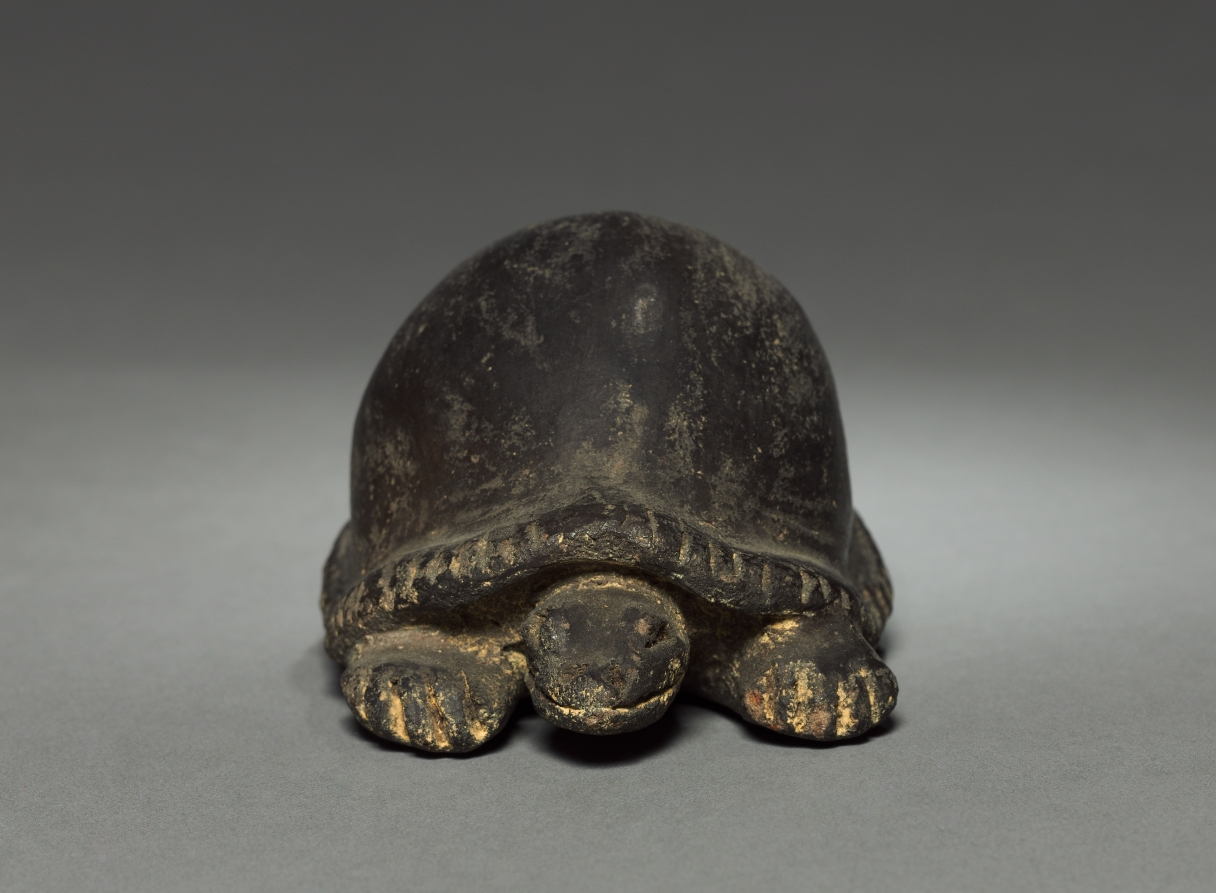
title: Turtle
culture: Colombia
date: before 1921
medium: pottery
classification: Ceramic